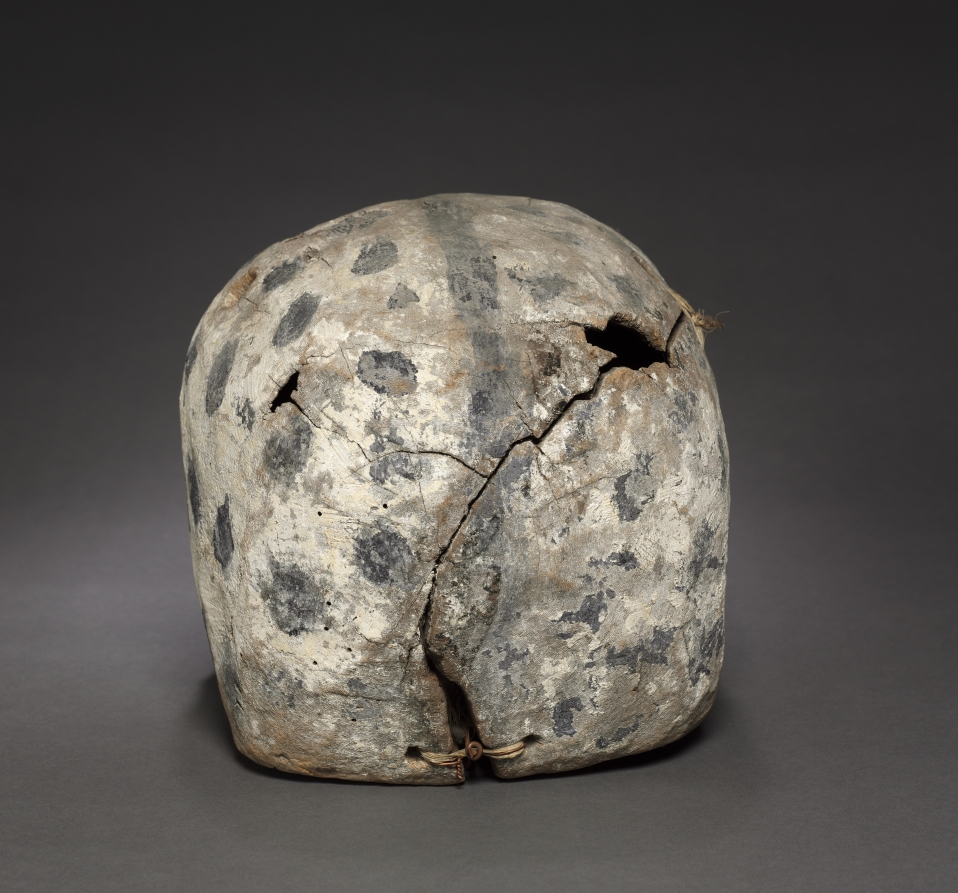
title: Mask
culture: Mexico, Paintla, 19th century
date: 1800s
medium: wood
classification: Sculpture